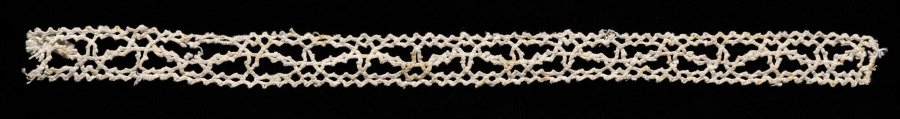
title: Lace Insertion (no selvage)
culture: Italy, Venice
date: 1580–99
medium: Bobbin lace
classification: Lace